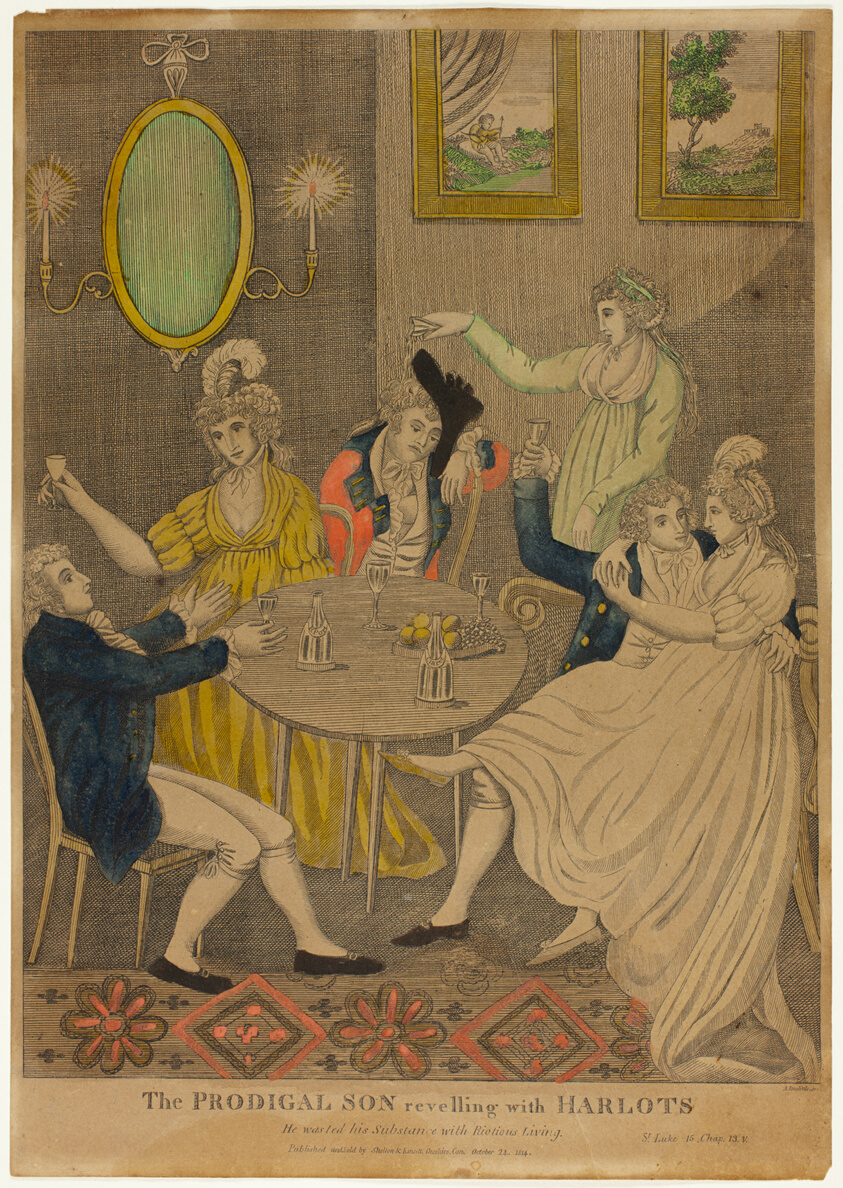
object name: Print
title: The Prodigal Son with Harlots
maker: Amos Doolittle (American, 1754-1832)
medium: Hand-colored engraving on paper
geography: United States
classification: wood engraving; print; prints and drawing